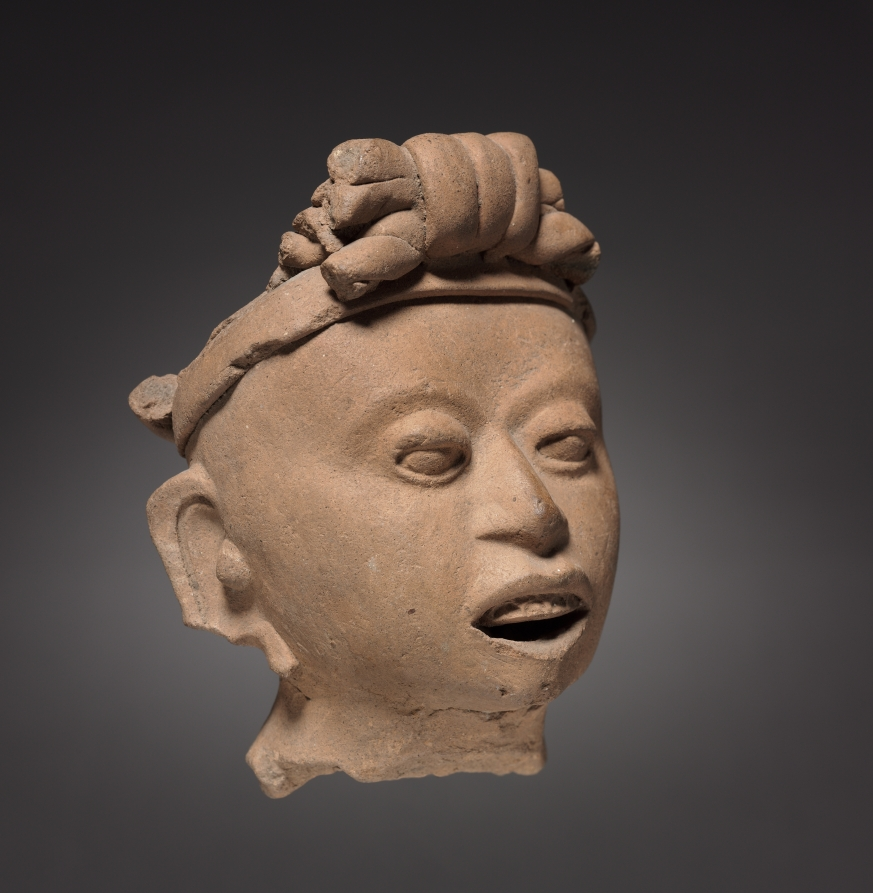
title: Head Fragment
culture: Mexico, Veracruz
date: 900–1200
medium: molded and modeled pottery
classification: Sculpture